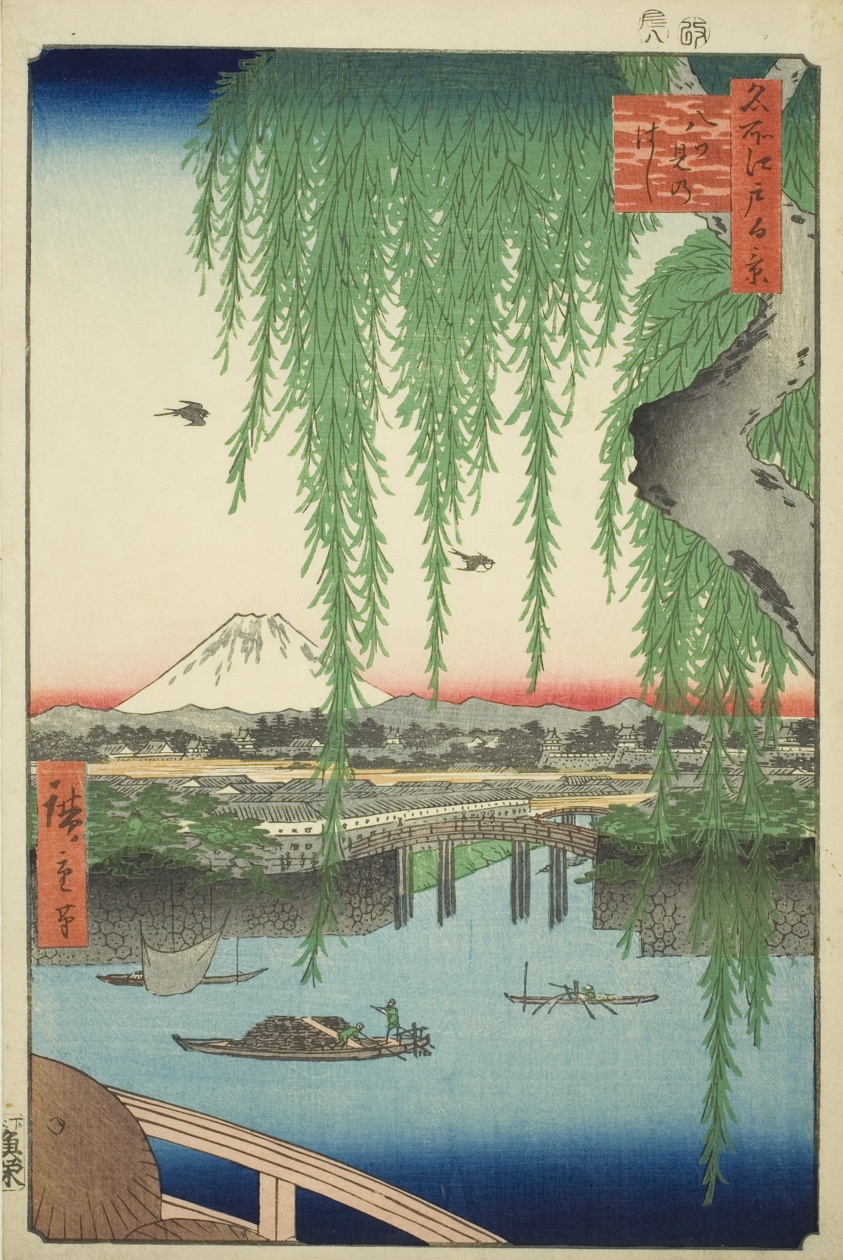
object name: Print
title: Yatsumi Bridge (Yatsumi no hashi), from the series "One Hundred Famous Views of Edo (Meisho Edo hyakkei)"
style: Japanese (culture or style)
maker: Utagawa Hiroshige 歌川 広重; Japanese, 1797-1858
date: 1856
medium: Color woodblock print; oban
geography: Japan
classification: woodblock print; print; asian art